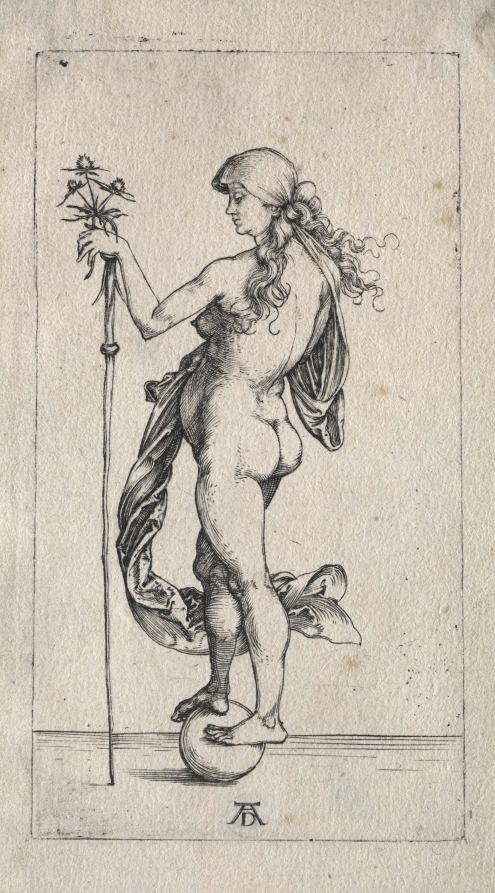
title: The Little Fortune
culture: Germany, late 15th-early 16th Century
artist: Albrecht Dürer (German, 1471–1528)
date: c. 1497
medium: engraving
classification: Print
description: With the help of a staff, Fortuna, the goddess of fortune or chance, balances on a sphere and holds a sprig of flowers in her left hand. In addition to representing her instability, the sphere suggests the worldly domain over which she influences at random. The flowers, traditionally identified as Eryngium, held aphrodisiac powers, suggesting the fickle nature of love. A more recent interpretation identifies them as Sternkraut, a plant that symbolized the idea that one’s fate has already been written. Both readings of the engraving, whether it regards love or life, inform the viewer that destiny is not of one’s own choosing.